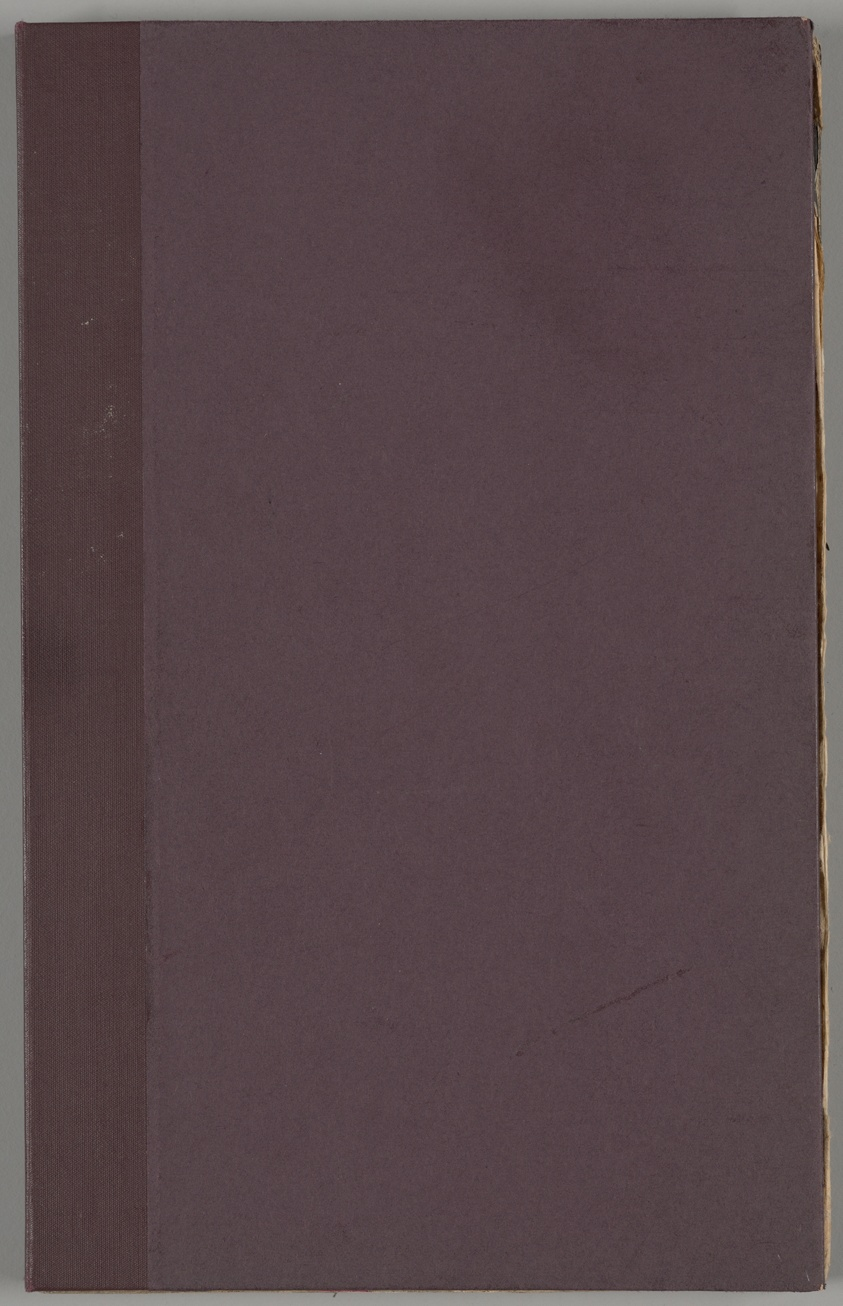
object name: Book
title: Soken sekisatsu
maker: Ito Jakuchu (Japanese, 1716-1800)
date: 1767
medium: Woodblock printed book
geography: Japan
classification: book